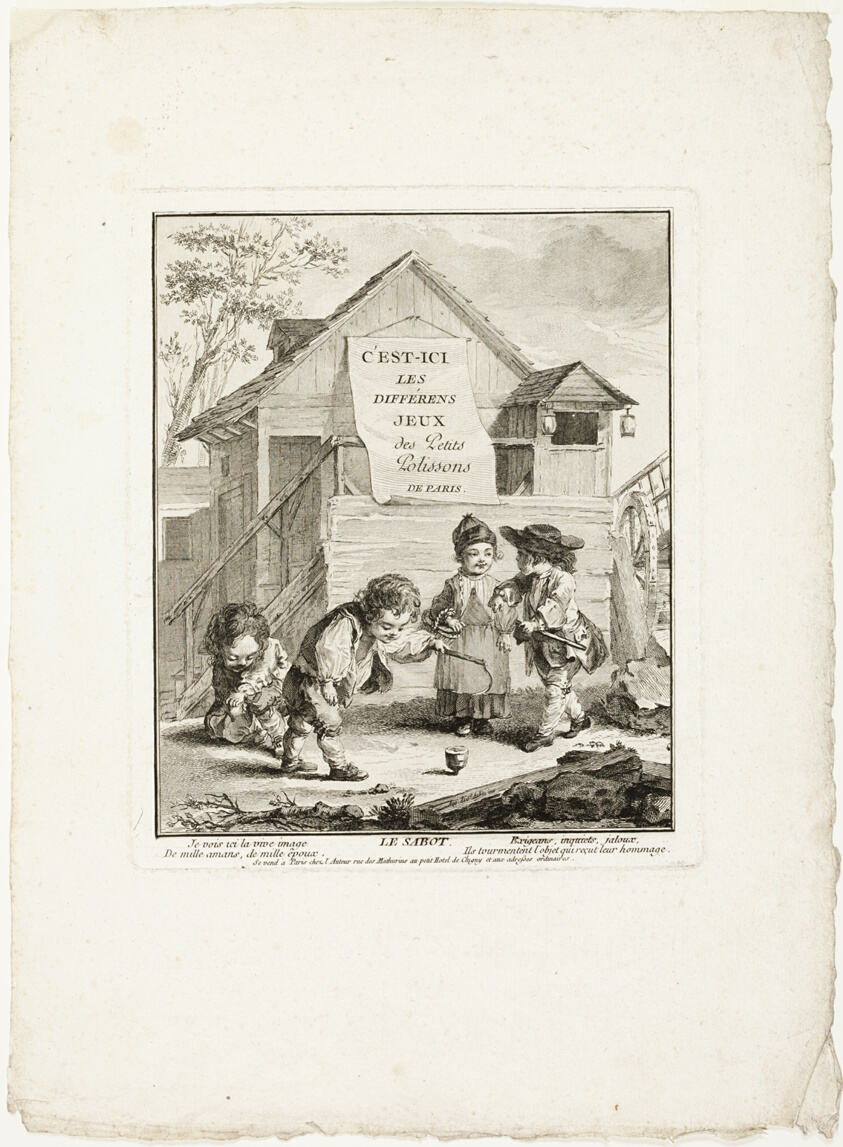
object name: Print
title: Horse Shoes, from The Games of the Urchins of Paris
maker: Jean-Baptiste Tilliard (French, 1740–1813); after Augustin de Saint-Aubin (French, 1736-1807)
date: 1770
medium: Etching on ivory laid paper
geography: France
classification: etching; print; prints and drawing